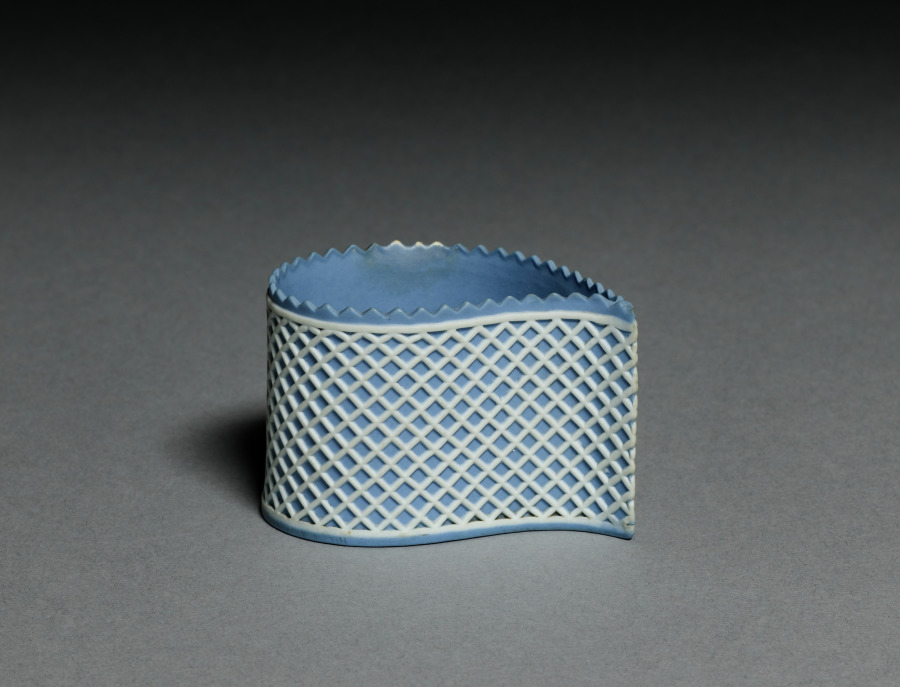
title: Custard Cup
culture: England, Staffordshire, 18th century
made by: Wedgwood Factory (British)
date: c. 1785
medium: jasper ware with relief decoration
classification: Ceramic